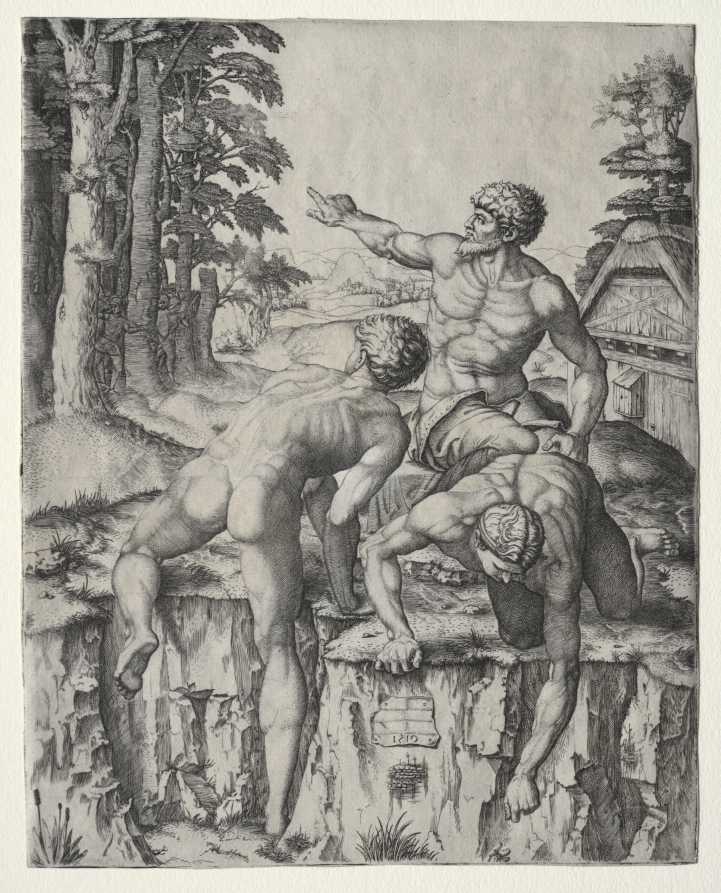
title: The Climbers (Three Figures from Michelangelo's Battle of Cascina)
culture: Italy, 16th century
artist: Marcantonio Raimondi (Italian, 1470/82–1527/34)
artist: after Michelangelo Buonarroti (Italian, 1475–1564)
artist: after Lucas van Leyden (Netherlandish, 1494–about 1533)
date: 1510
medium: engraving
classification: Print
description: Although Michelangelo’s 1504 commission to paint the monumental Battle of Cascina fresco in Florence’s city hall was never completed, his cartoon (full-scale drawing) for the composition was studied by many artists in Florence before being destroyed. In this print made just six years after the commission, engraver Marcantonio Raimondi directly quoted three figures from the left side of the cartoon, demonstrating his superior ability in accurately rendering Michelangelo’s heroic male figures. The landscape, which Marcantonio copied from a print by Netherlandish artist Lucas van Leyden, shows his impressive range as a printmaker.